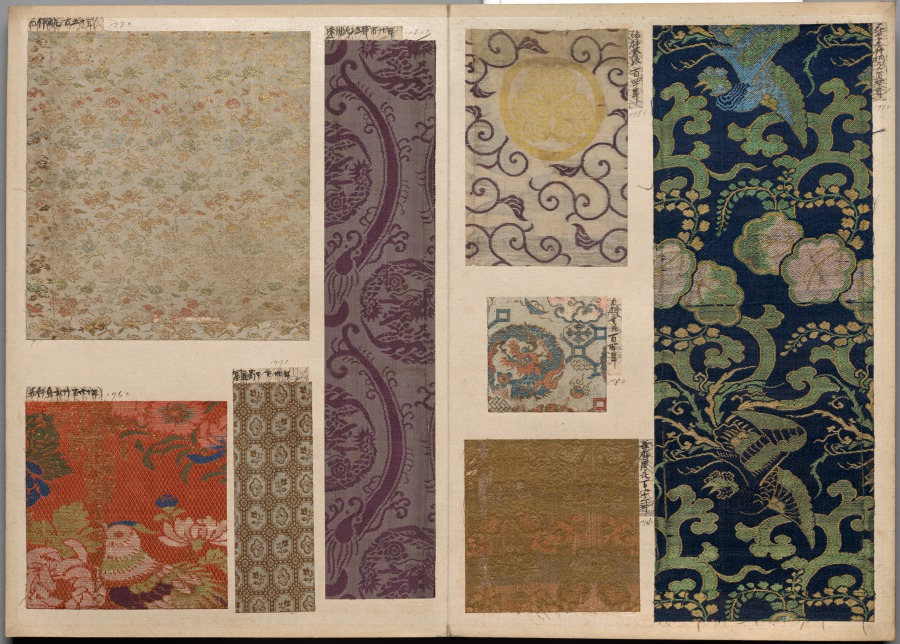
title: Album of Textile Samples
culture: Japan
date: 1790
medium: silk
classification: Textile